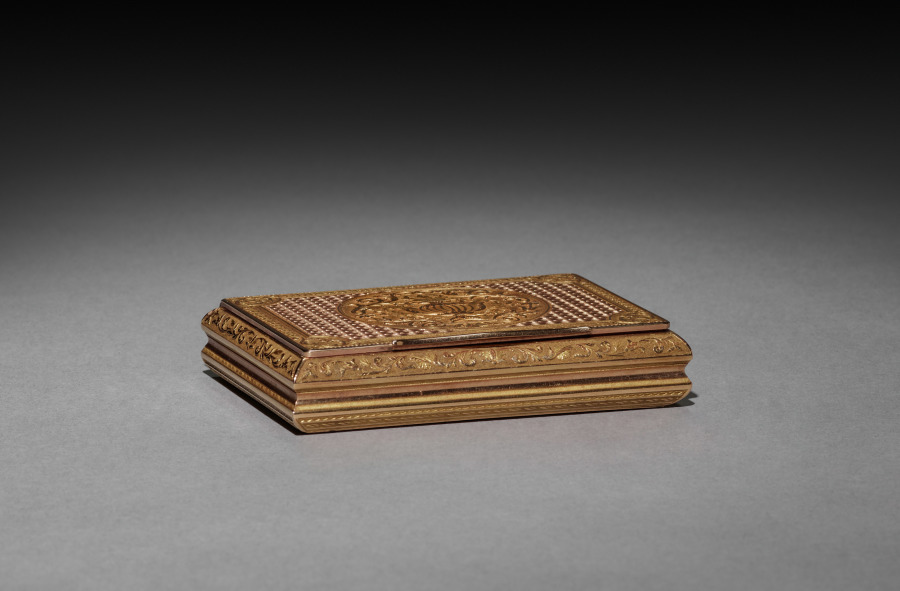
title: Snuff Box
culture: Switzerland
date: c. 1825–1850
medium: gold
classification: Miscellaneous